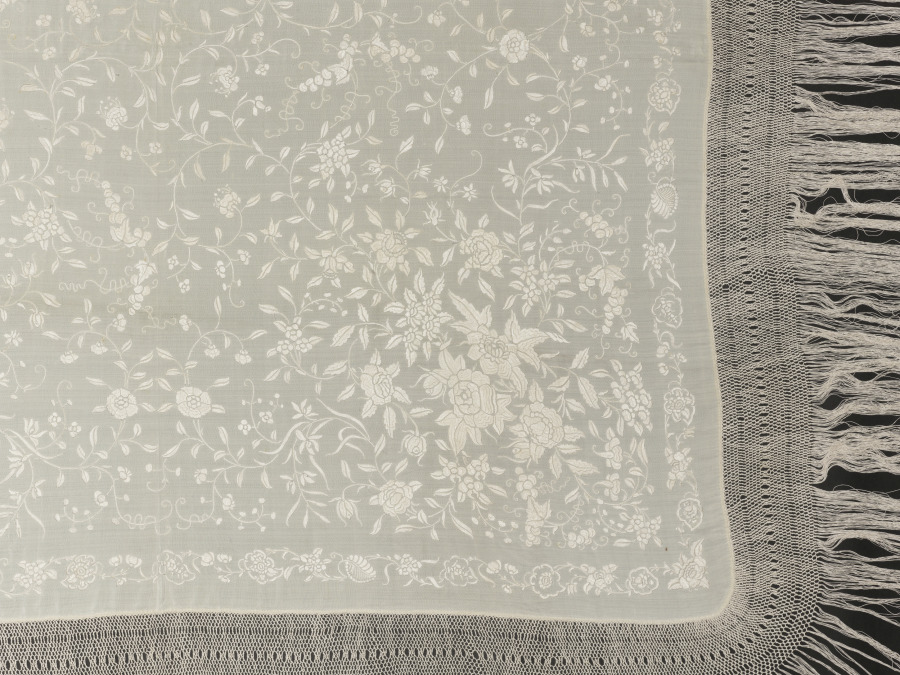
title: Silk Shawl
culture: China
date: 1800s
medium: embroidery, silk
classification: Embroidery